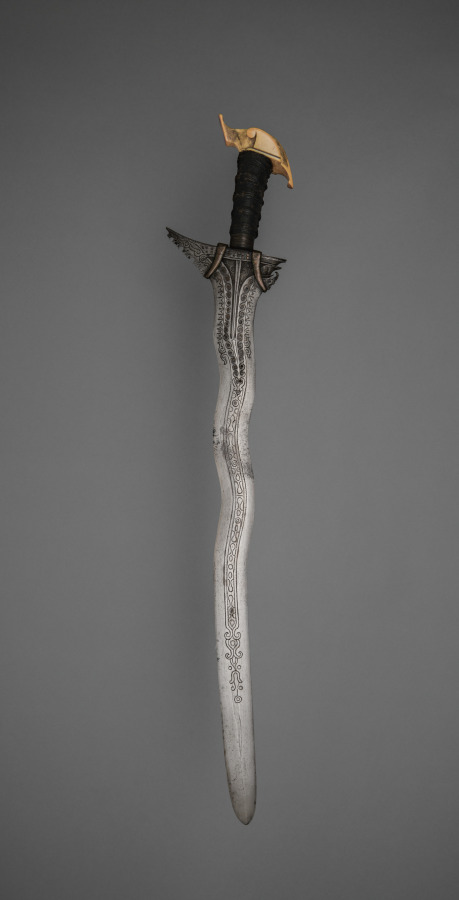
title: Sword (Kalis or Sundang)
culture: Philippines, Mindanao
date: before 1916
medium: Metal blade with ivory pommel and cord-wound grip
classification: Arms and Armor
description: This sword’s blade is straight near the tip and transitions into gentle undulations toward the lower half. Fine inlaid geometric and floral motifs run along the central ridge. The ivory pommel takes the form of a cockatoo (kakatua), a high-status motif in southern Philippine weaponry. The curving blade form, intricate inlay, and ivory pommel make this a prestige weapon.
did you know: The part wavy, part straight blade form is known as a kalis taluseko.